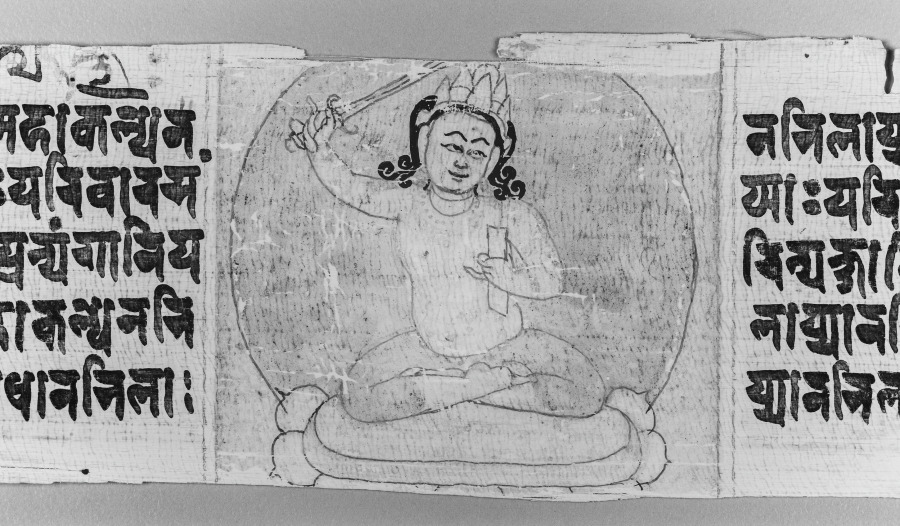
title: Bodhisattva Samantabhadra purifies the path to enlightenment, with Manjushri, folio 348 (verso) from a Gandavyuha-sutra (Scripture of the Supreme Array)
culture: Nepal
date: 1000–1100s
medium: gum tempera and ink on palm leaf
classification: Painting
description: The painting in the center shows a righteous bodhisattva tossing aside a blue-skinned heretic, while an impious blue-clad monk sits behind them, the next to be overpowered by the righteous one. In the painting on the left, the Bodhisattva of Wisdom, Manjushri, brandishes his sword, and at the far right, a Buddhist priest (Vajracharya) sets fire to a Hindu sage in a rocky landscape.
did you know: Blue-clad monks were said to visit prostitutes, drink liquor, and practice extreme tantric rituals.